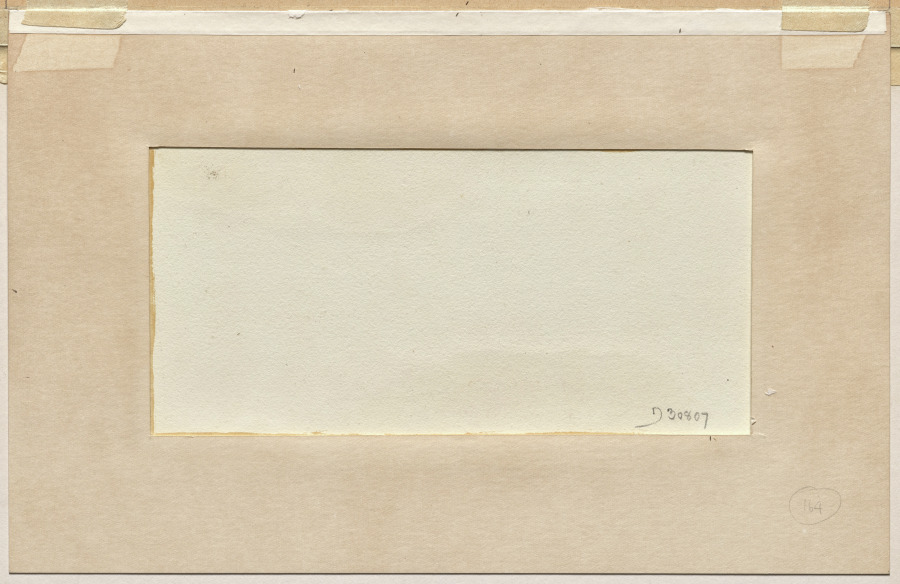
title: The Pyramid of Cestius, Rome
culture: Netherlands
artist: Michiel van Overbeek (Dutch, active 1663–1709)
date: c. 1650–80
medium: Pen and brown ink with red chalk on brown prepared paper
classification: Drawing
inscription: Inscribed u.m. Sepulchre Cesty, initialled l.r. M.V.O. del[?]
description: The Dutch artist Michiel Van Overbeek drew The Pyramid of Cestius, Rome from southwest of the site, looking toward the 12 BC Pyramid of Cestius, and the 3rd- to 4th-century Porta Ostiensis (Porta Santo Paulo). The Egyptian structure in the Roman countryside attracted many tourists, and artists, for its singularity within the Roman architectural landscape. The careful attention given to the rise of the land at left, with small abodes tucked into the hills, and the crumbling ruin at the right, suggest that Van Overbeek wanted to record the scene as accurately as possible.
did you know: The Pyramid of Cestius was constructed in Rome as a tomb in 12 BC during a fad for Egyptian things just a few years after Rome had conquered Cleopatra’s Egypt (30 BC).